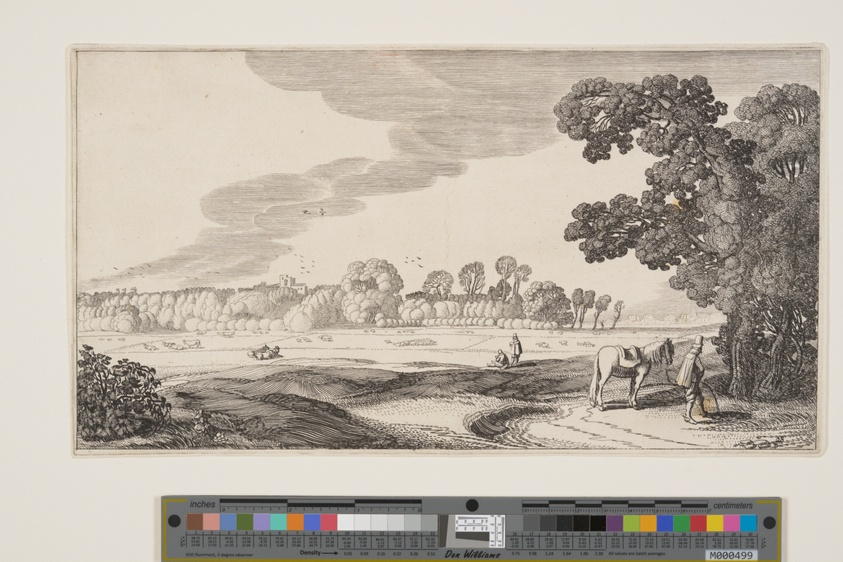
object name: Print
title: View of Pastures, from Landscapes (Playsante Lantschappen)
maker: Attributed to Claes Jansz. Visscher II (Dutch, 1586-1652); after Jan van de Velde II (Dutch, c. 1593-1641)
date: c. 1641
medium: Etching, with engraving, on ivory laid paper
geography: Netherlands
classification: etching; paper; print; prints and drawing